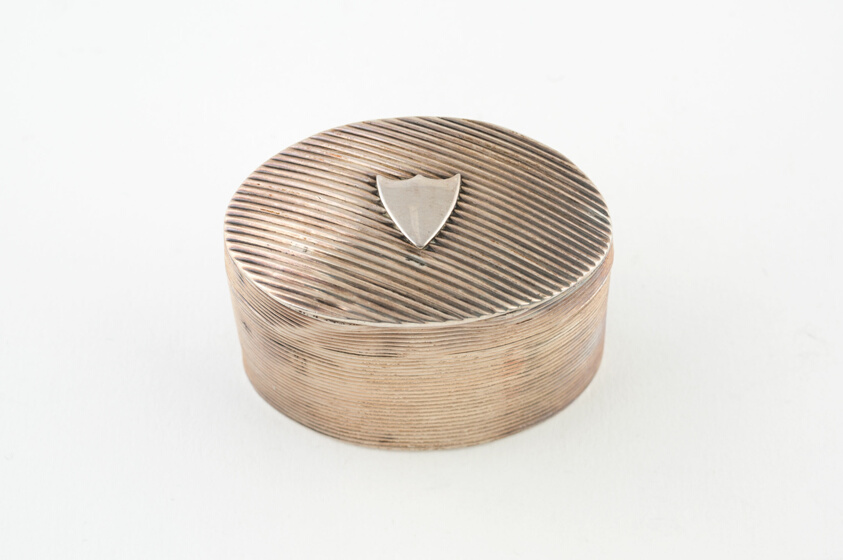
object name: Metalwork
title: Sponge Box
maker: Netherlands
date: 1827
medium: Silver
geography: Netherlands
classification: container for personal use; box; european decorative arts; metalwork; silver; decorative object/ornament